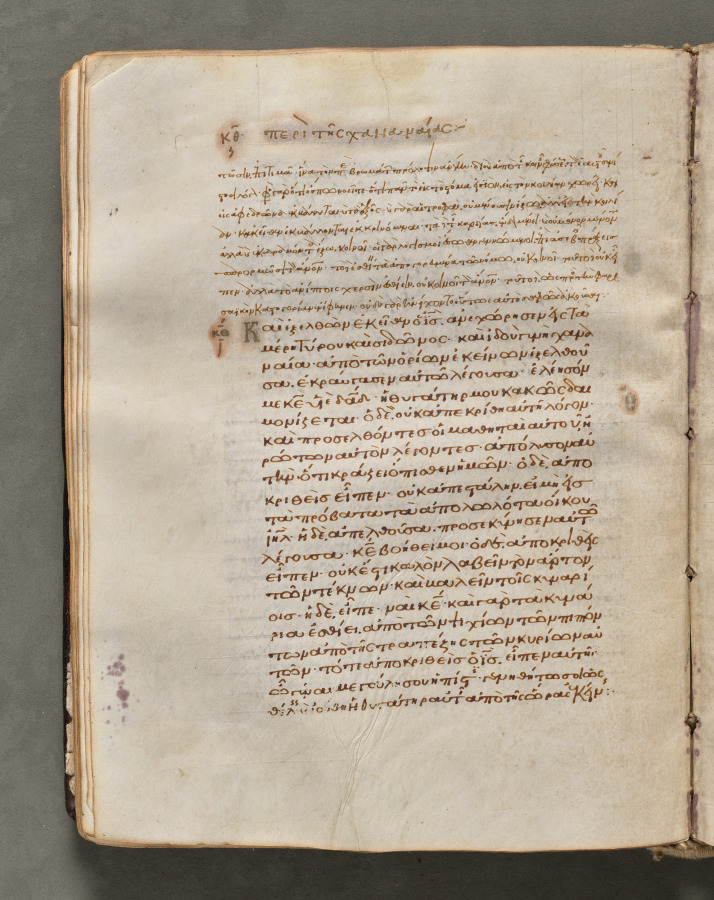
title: Text, folio 69 (verso), from a Gospel Book with Commentaries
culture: Byzantium, Constantinople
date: c. 1000–1100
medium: ink, tempera, and gold on vellum; leather binding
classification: Bound Volume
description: Each of the four gospels in this book opens on a page with brilliantly illuminated borders depicting the author of the text as well as birds-principally peacocks, symbols of the immortality of the soul-and fountains, representing the fountain of life and the salvation of the soul. This volume consists of 428 leaves with texts in Greek. Its level of sophistication suggests that it was probably written and decorated in a monastery in Constantinople.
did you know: Gospel Books were carried in procession through Byzantine churches.